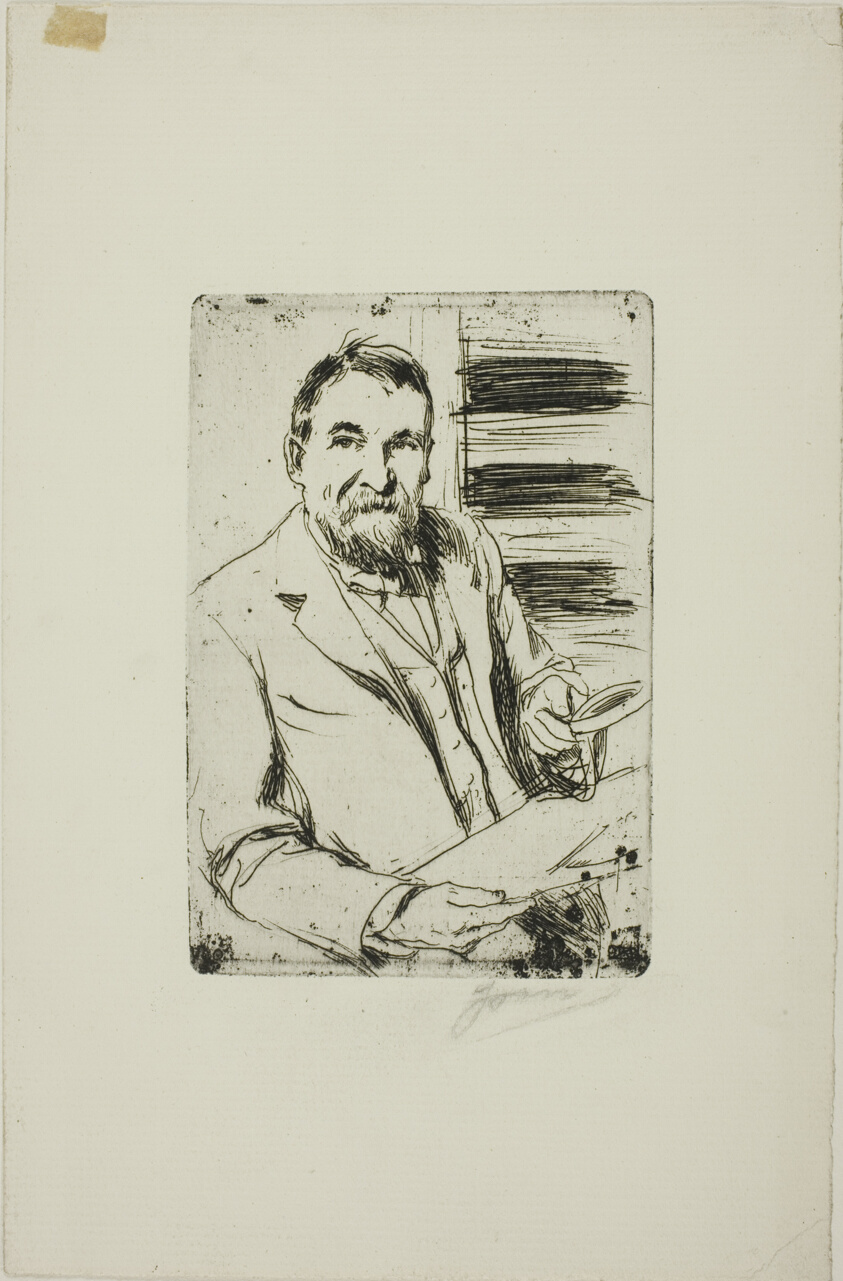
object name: Print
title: Frederick Keppel I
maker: Anders Zorn (Swedish, 1860-1920)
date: 1898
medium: Etching on ivory laid paper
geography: Sweden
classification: etching; print; prints and drawing